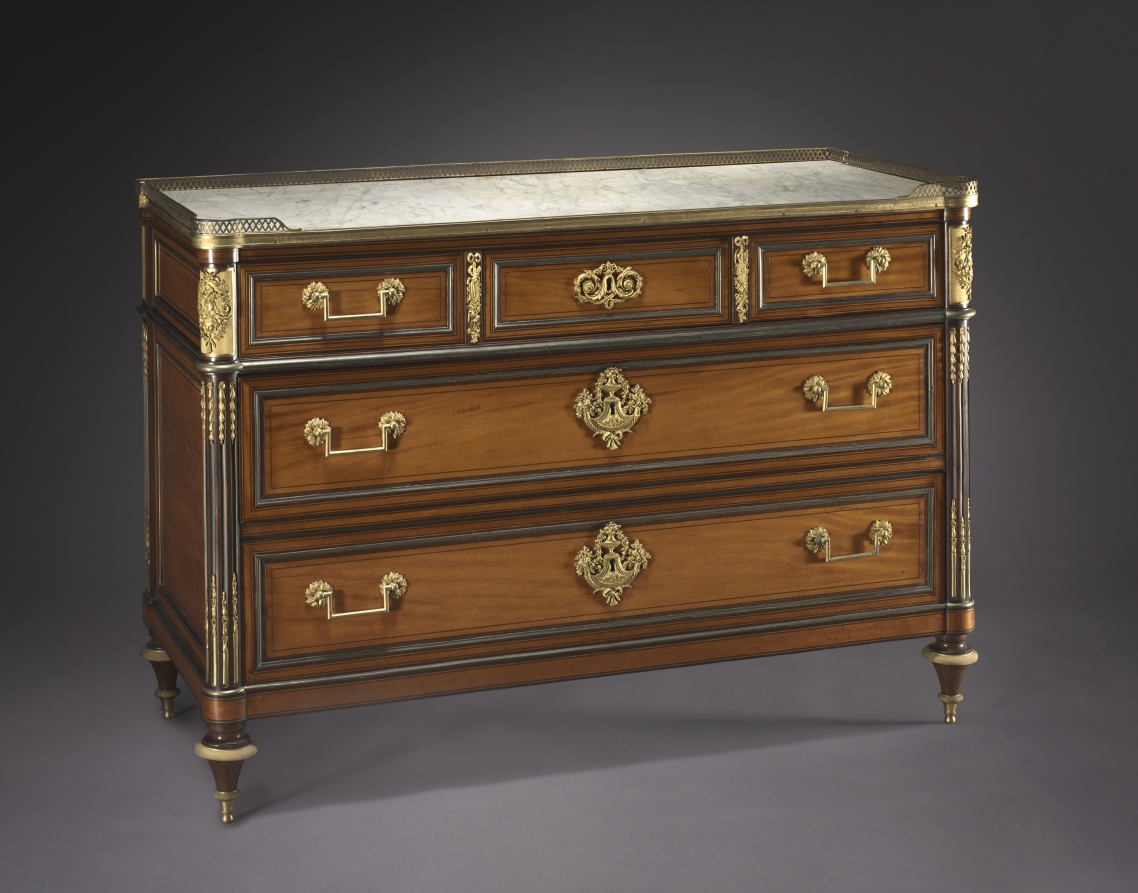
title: Chest of Drawers (Commode)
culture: France, style of Louis XVI, 18th Century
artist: attributed to Claude-Charles Saunier (French, 1735–1807)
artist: mounts in the style of Pierre Joseph Désiré Gouthière (French, 1732–1813/14)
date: c. 1775–1792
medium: oak, coralwood, mahogany veneer, marble top, gilt bronze mounts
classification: Furniture and woodwork